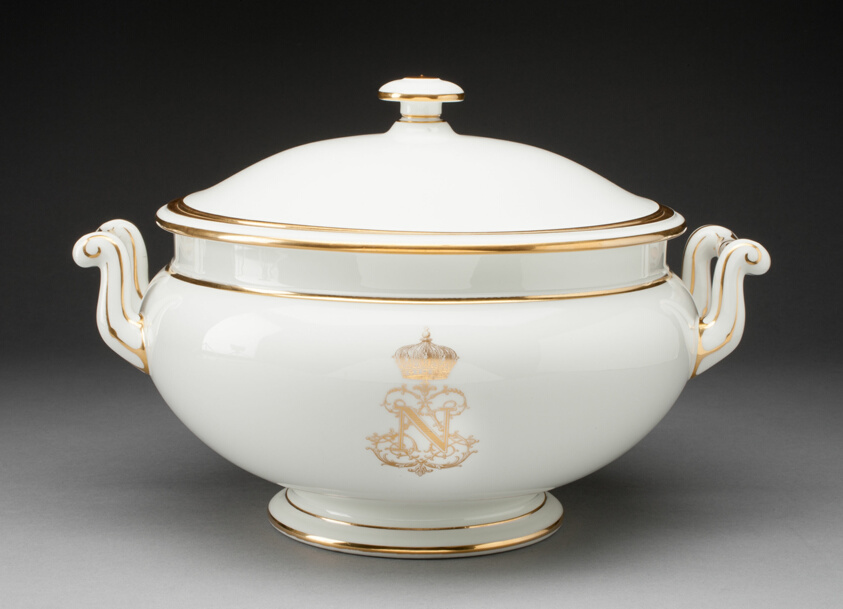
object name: Ceramics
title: Tureen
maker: Sèvres Porcelain Manufactory; French, founded 1740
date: 1861/64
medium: Hard-paste porcelain and gilding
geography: Sèvres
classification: tableware; porcelain; european decorative arts; ceramics